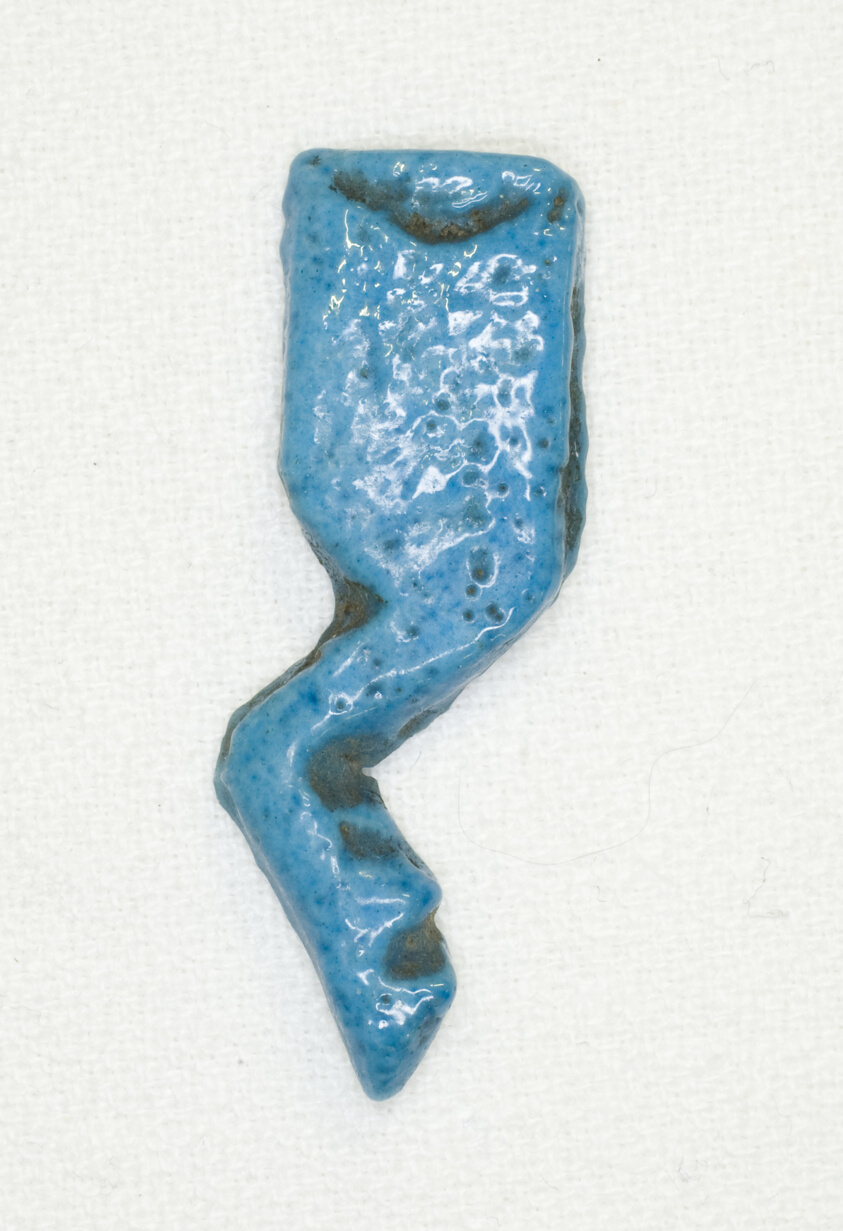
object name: Costume and Accessories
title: Foundation Deposit: Calf's Foreleg (khepesh)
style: new kingdom, egyptian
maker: Egyptian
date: New Kingdom? (about 1550–1069 BCE)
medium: Faience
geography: Egypt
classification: amulet; ancient art; votive offering; inlay; costume; faïence (composite material)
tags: cows, animals, sacrifice